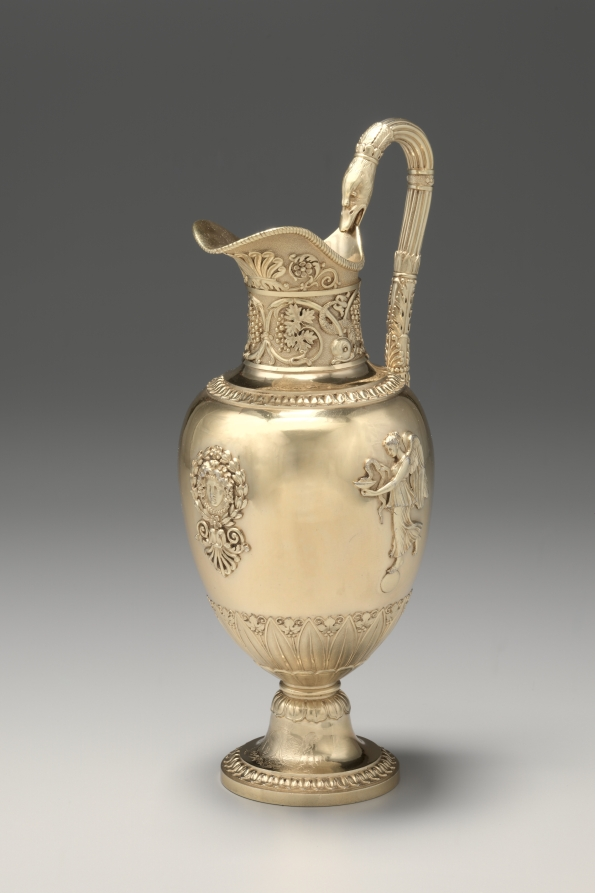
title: Ewer (aiguière)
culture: France, 19th century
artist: Jean Baptiste Claude Odiot (French)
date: c. 1817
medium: silver gilt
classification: Silver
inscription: [Excise mark for medium-sized work, Paris, 1809-1819, on edge of base]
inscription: [Two maker's marks of Jean-Baptiste-Claude Odiot after the Revolution, inside foot]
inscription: [Official assay mark for first standard silver, Paris, 1809-1819, near exterior upper rim]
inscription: [Applied coat of arms of the count Alfred de la Chapelle, Seigneur of Morton and Beaulieu, Périgord “accolé” with an alternate version of de la Chapelle, exterior of foot]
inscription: [Struck twice, interior foot]: "ODIOT"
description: Jean-Baptiste-Claude Odiot’s reputation stretched internationally. Commissioned by Russian count Nikolei Demidoff, this ewer was one part of an extensive silver dinner service. Decorated with motifs of classical antiquity, this object’s Greco-Roman silhouette, grape vine frieze, raised mythological figures, and sinuous swan’s neck handle were likely inspired by the designs of Charles Percier and Pierre-François Fontaine, architects of Napoleon I.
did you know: The coat of arms on the foot of this ewer belongs to the count Alfred de la Chapelle who owned this silver dinner service during the second half of the 19th century.